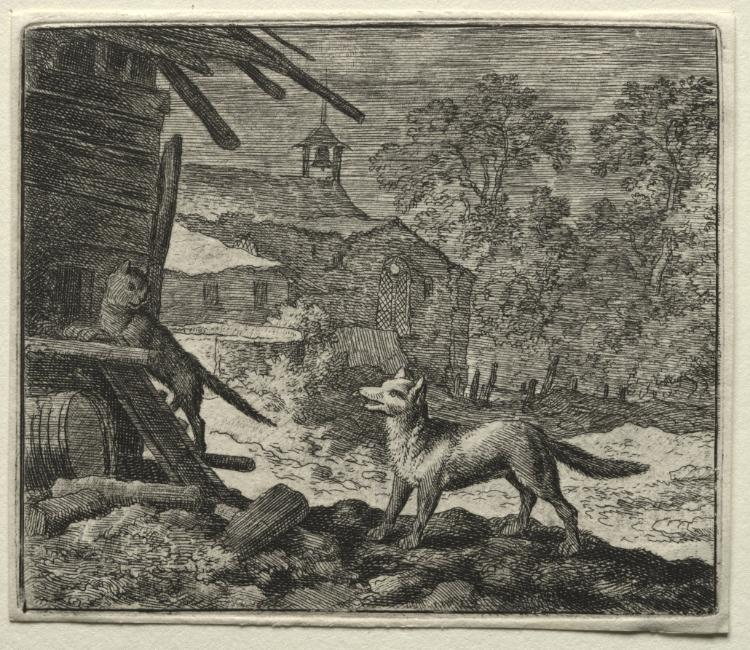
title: Reynard the Fox: Reynard Deceives the Cat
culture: Netherlands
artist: Allart van Everdingen (Dutch, 1621–1675)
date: 1650–75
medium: etching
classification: Print